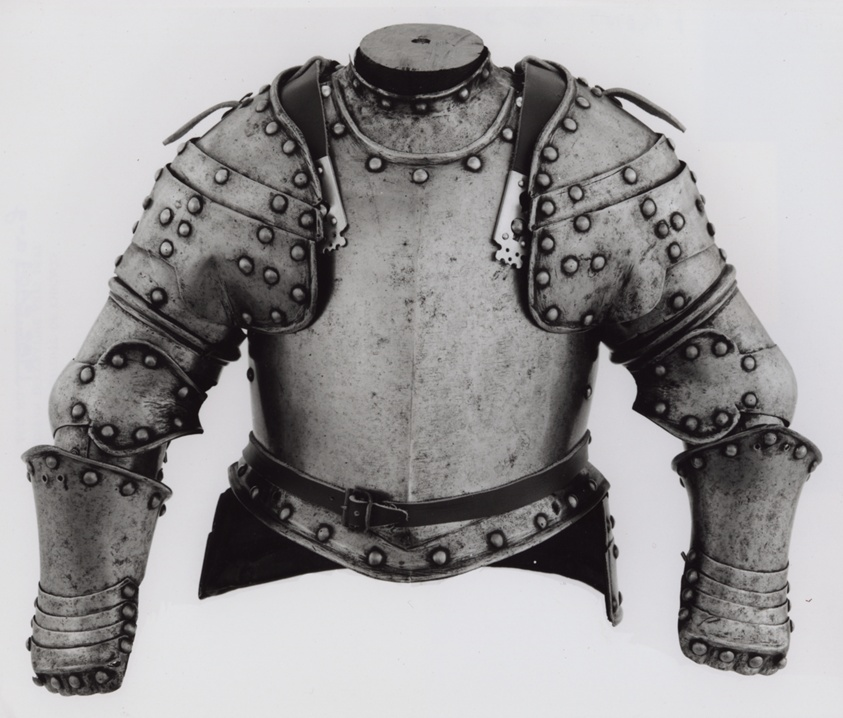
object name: Armor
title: Boy's Armor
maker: Western European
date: late 17th century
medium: Steel, brass, and leather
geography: France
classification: suit; armor; arms and armor